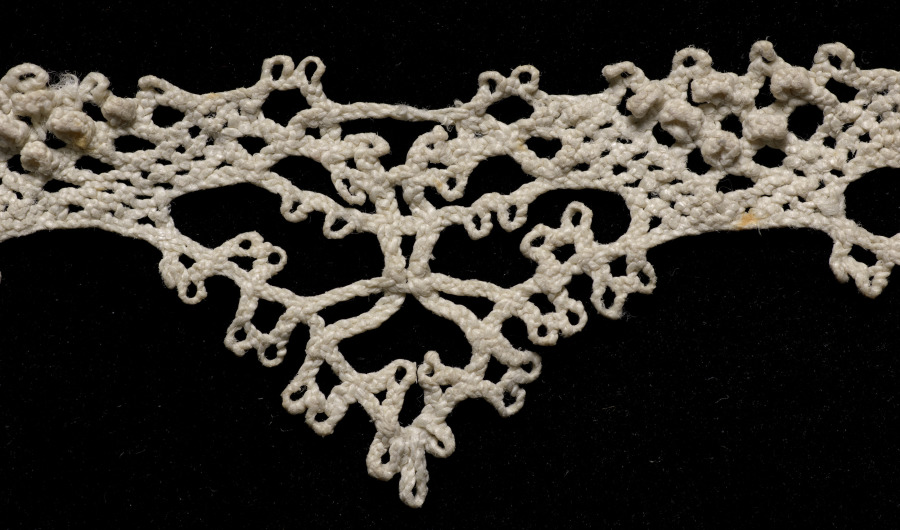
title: Lace Edging of Points (no selvage)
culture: Italy, Venice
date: 1540–60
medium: Bobbin lace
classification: Lace